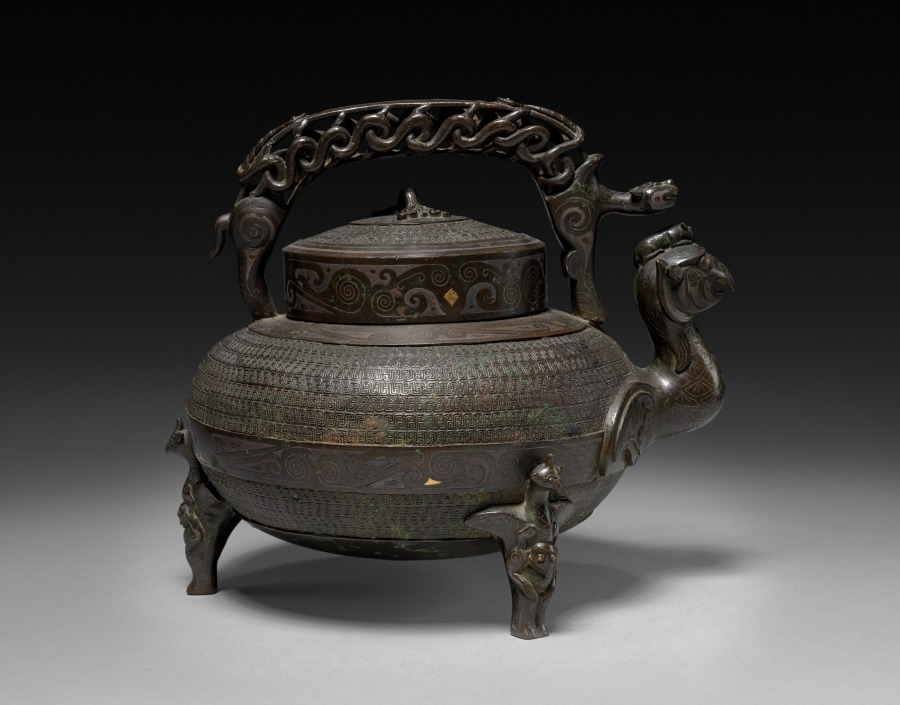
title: Kettle with Handle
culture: China, Qing dynasty (1644-1911) or Republican period (1912-49)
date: 1700s–1800s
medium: bronze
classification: Metalwork